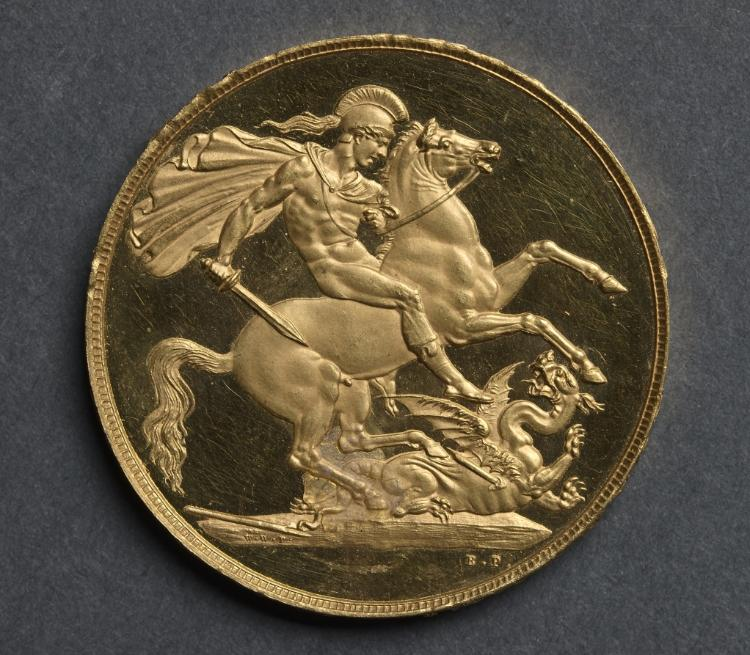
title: Two Pound Piece: St. George and the Dragon (reverse)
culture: England, George III, 1760-1820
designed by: after Benedetto Pistrucci (Italian, 1784–1855)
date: 1820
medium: gold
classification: Coins